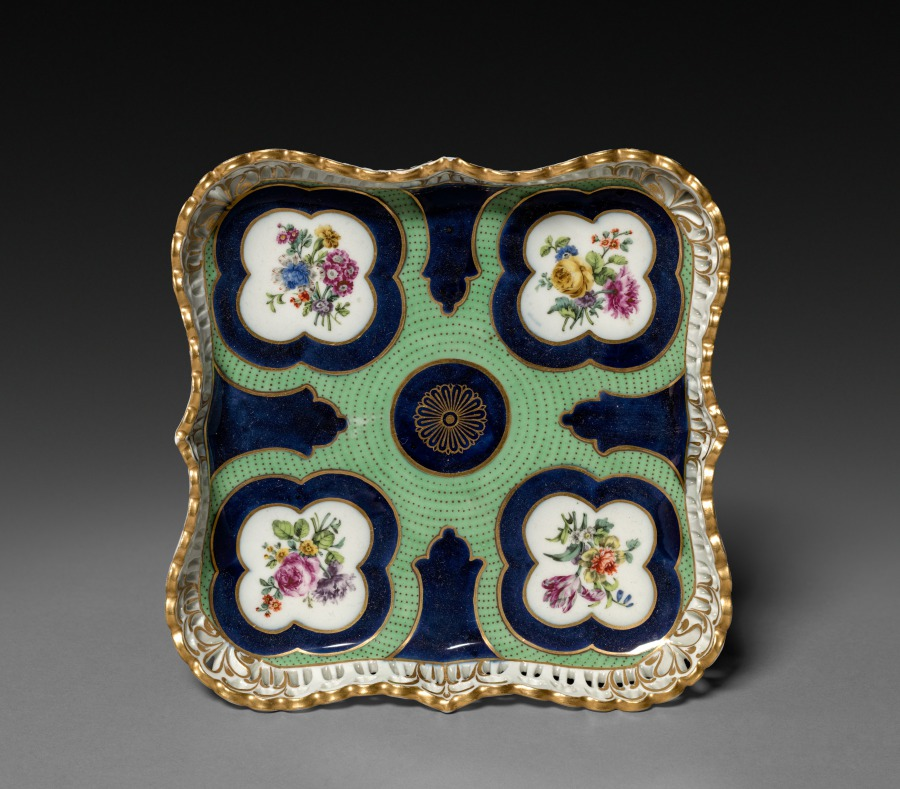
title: Stand for a Cup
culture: Austria, Vienna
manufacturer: Du Paquier Porcelain Manufactory (Austrian, active 1719–1864)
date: c. 1780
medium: porcelain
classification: Ceramic